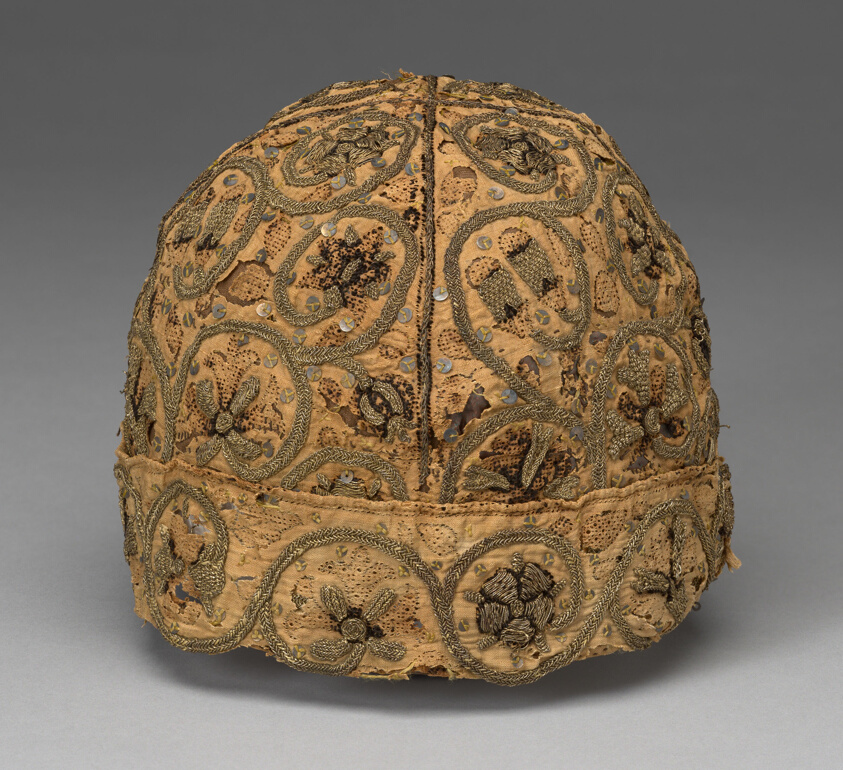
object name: Costume and Accessories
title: Man's Cap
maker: England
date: 16th century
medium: Linen, plain weave; embroidered with silk and gold thread, with spangles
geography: England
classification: textile; costume accessory - headdress; needlework (visual works); costume - needlework; costume; dress (garment); clothing